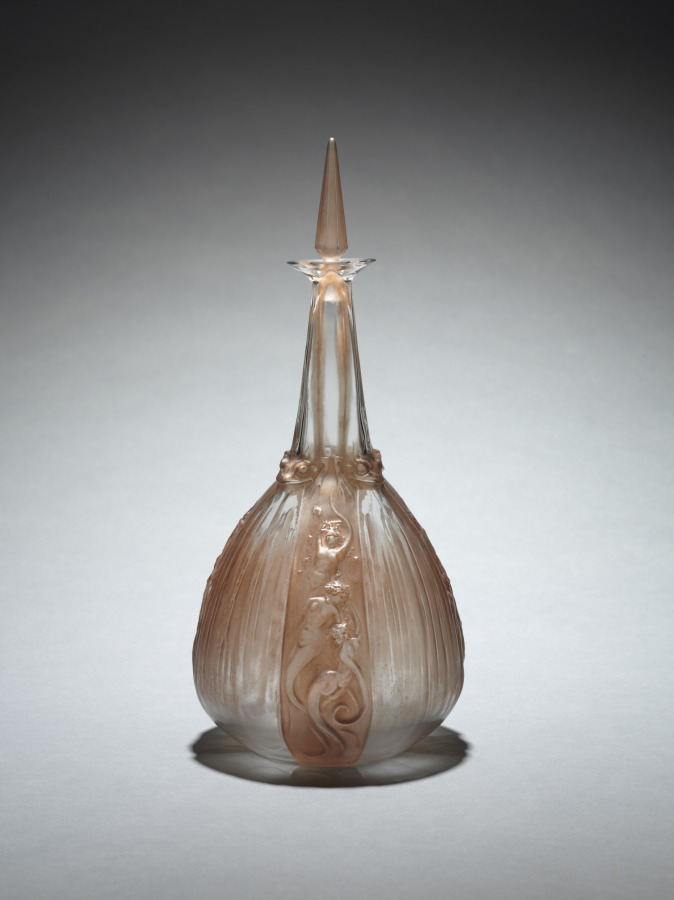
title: Mermaids and Frogs Decanter (Carafe sirènes et grenouilles)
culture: France, 20th century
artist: René Lalique (French, 1860–1945)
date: 1917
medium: glass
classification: Glass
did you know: The title of this work translates to mermaids and frogs carafe.